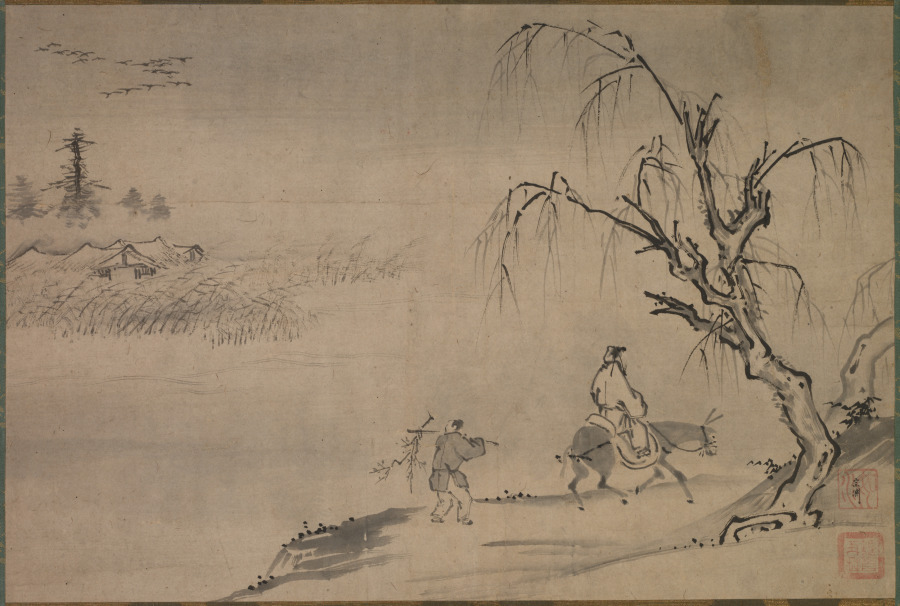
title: Chinese Literatus in an Autumn Landscape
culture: Japan, Muromachi period (1392–1573)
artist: Josui Sōen (Japanese, active c. 1489–1500)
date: late 1400s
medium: hanging scroll; ink on paper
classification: Painting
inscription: Signed: "Sō'en" 宗淵. Sealed: "Josui" 如水; one seal unread.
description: In this painting, Sesshū Tōyō’s disciple Sōen depicts a Chinese scholar-official astride a donkey with his attendant behind. Framing their passage on the right side of the scene are two bare willows, and on the left, geese in flight, the cries of which capture the pair’s attention. These elements suggest that the season is late autumn. Sōen, who famously received Sesshū’s 1495 Splashed-ink Landscape as a certificate of his success as a pupil, studied with the master in Suō, presentday Yamaguchi, after which he returned to his native province in the Kanto region.